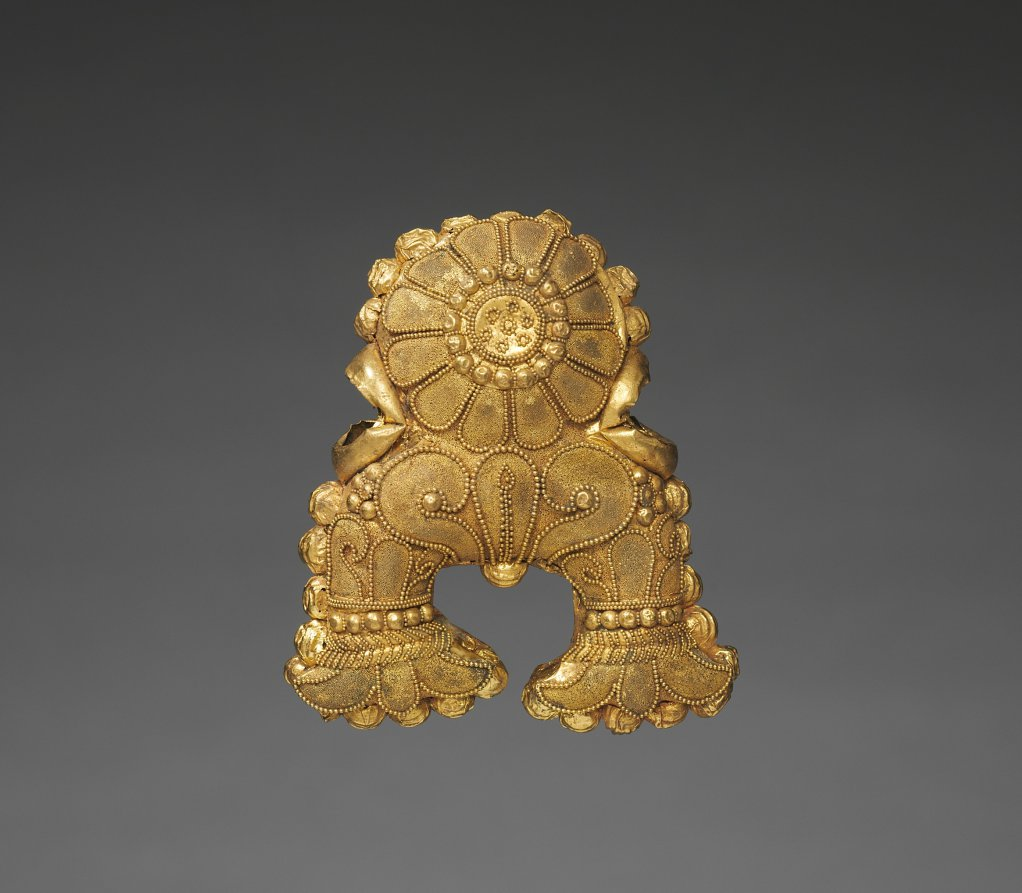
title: Triratna Pendant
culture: India, Uttar Pradesh or Madhya Pradesh, Shunga period (185–78 BCE)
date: 185–72 BCE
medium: gold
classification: Jewelry